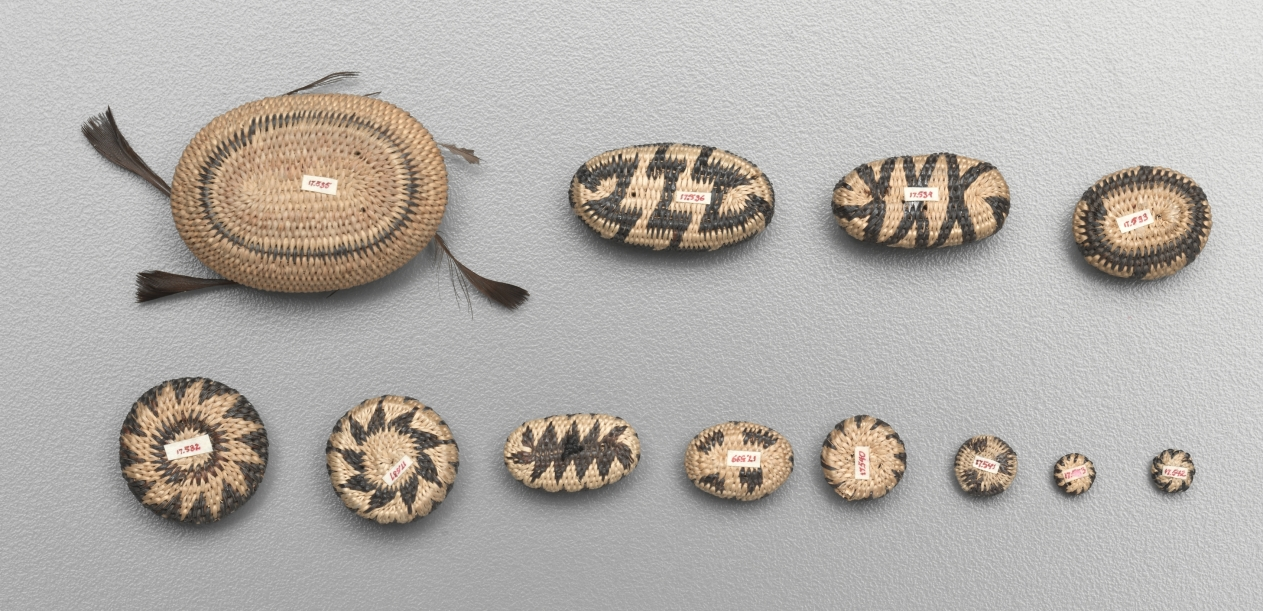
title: Miniature Rhomboidal Basket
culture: California, Pomo, late 19th-early 20th century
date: late 1800s-early 1900s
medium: plant materials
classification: Basketry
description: Miniature baskets were made to demonstrate the basket-maker’s virtuoso skill, and these tiny marvels seem to be no exception—the smallest are just a few millimeters wide but still patterned. For such fine work, dexterity was required as much for preparation of materials as for weaving.